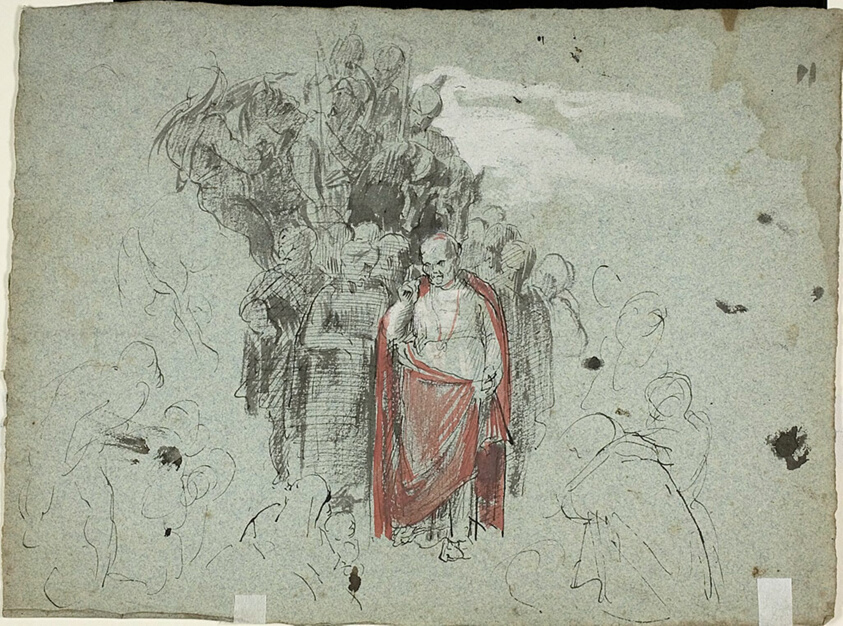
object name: Print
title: Speke Hall: The Avenue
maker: James McNeill Whistler (American, 1834-1903)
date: 1870–1878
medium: Etching and drypoint with foul biting in dark brown ink on ivory laid paper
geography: United States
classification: etching; foul biting; drypoint; print; prints and drawing; paper